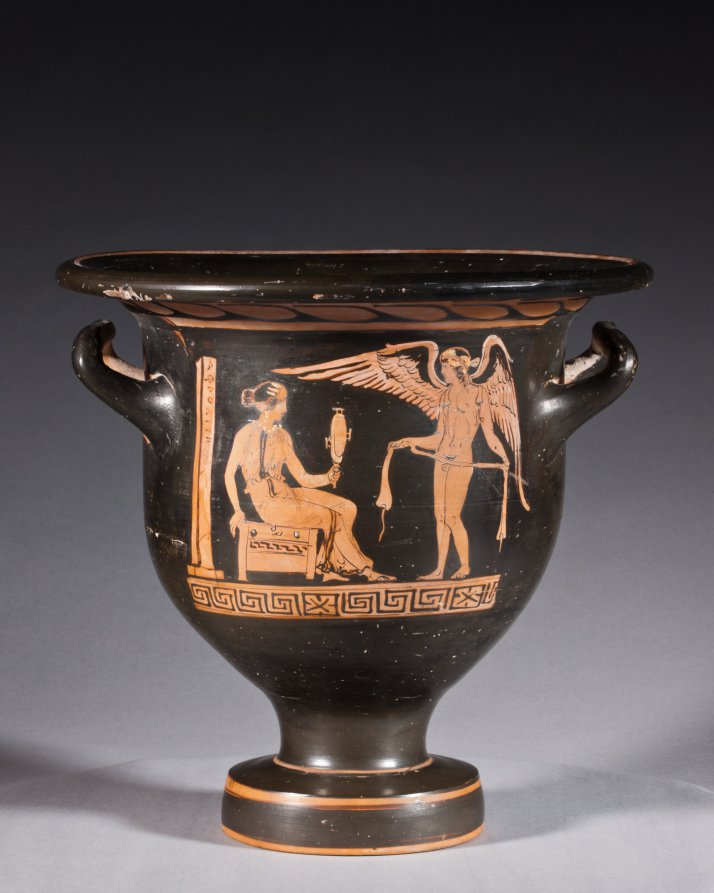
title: Red-Figure Bell Krater (Mixing Vessel): Aphrodite and Eros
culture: South Italian, Apulian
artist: attributed to Graz Painter (South Italian, Apulian, active c. 380–360 BCE)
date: c. 370–360 BCE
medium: ceramic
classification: Ceramic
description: This small mixing vessel shows a finely dressed woman seated on a chest and holding up a mirror to admire herself. Before her stands Eros, the winged god of love, holding a ribbon or sash. Behind the woman stands a pillar with the inscription ΑΦΡΟΔΙΤΗ, or APHRODITE, the goddess of love. Such labels are rare on vases, and scholars debate whether this names the woman shown as Aphrodite herself, with her son Eros, or a bride envisioning herself as Aphrodite, just before her wedding.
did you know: The dancing nude youths on the reverse are unusual; typically they would be standing and draped.